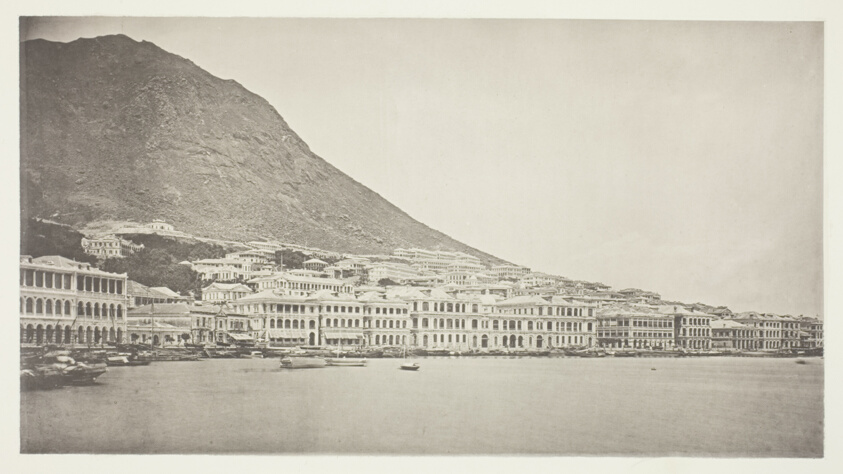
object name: Photograph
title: The Praya, Hong-Kong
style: 19th century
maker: John Thomson (Scottish, 1837–1921)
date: c. 1868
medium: Collotype, pl. VI from the album "Illustrations of China and its People, Volume I" (1873)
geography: Scotland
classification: photography; photograph